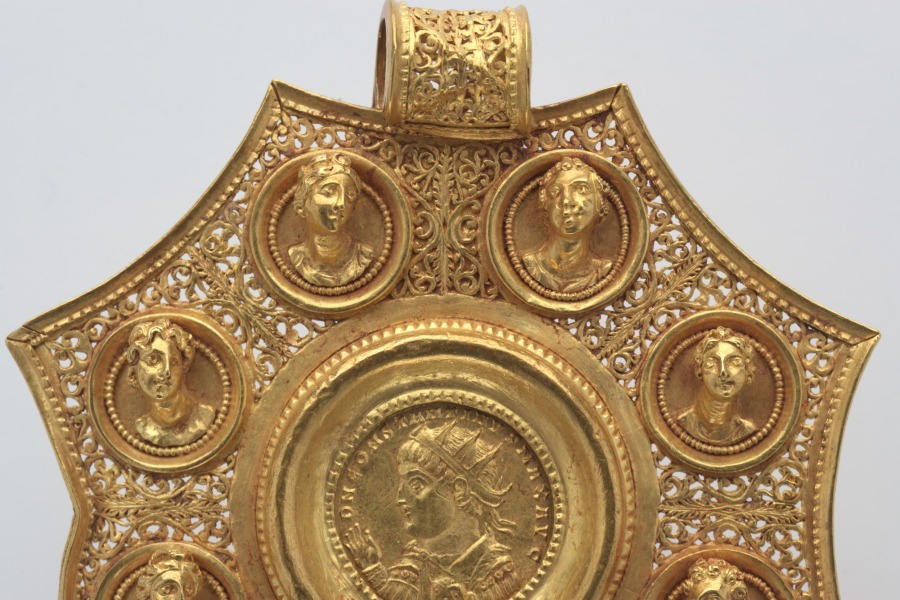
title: Octagonal Pendant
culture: Byzantium, Late Roman, Eastern Mediterranean, (probably Sirium or Nicomedia), Byzantine period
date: 324–26 CE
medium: gold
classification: Jewelry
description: Mounted at the center of this octagonal pendant is a rare coin issued by Constantine the Great, the Roman Empire’s first Christian emperor. Constantine’s portrait appears on the coin’s front, those of two of his sons on the back. Constantine’s image is surrounded by male and female busts, some of which are mythological figures. The pendant once formed the centerpiece of a sumptuous gold necklace, likely a gift for a high-ranking court official or member of the imperial family.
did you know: Precious Byzantine coins, such as the one in this pendant, were mounted as jewelry and bestowed upon court officials as a special honor. They signified loyalty to the emperor and were often passed down as family heirlooms. Does your family have special objects that have been preserved from generation to generation?